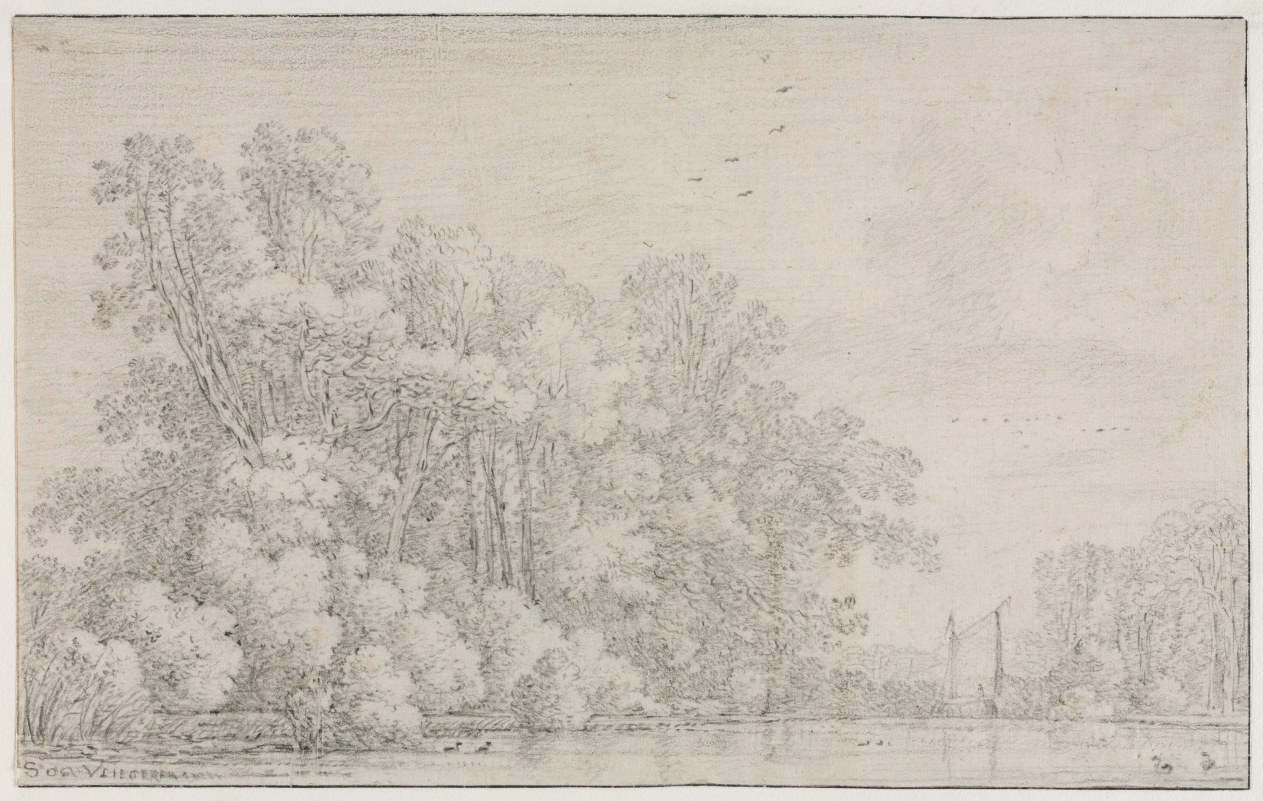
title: River Landscape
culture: Netherlands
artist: Simon de Vlieger (Dutch, 1601–1653)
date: c. 1650?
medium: black chalk; framing lines in black ink and brown ink (left)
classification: Drawing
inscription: signed, lower left, in black chalk: S de Vlieger ; VERSO, upper left, in graphite: [G ?] ; center, in graphite: 20 ; center, in graphite: S. de Vlieger / 1600-1656 ; center right, in graphite: 16 6[7 ?] [partially erased] [sideways] ; lower center, in graphite: 200 ; SECONDARY SUPPORT, lower right, in graphite: A ; VERSO OF SECONDARY SUPPORT, lower left, in graphite: PHTTS ; lower right, in graphite: D771-D